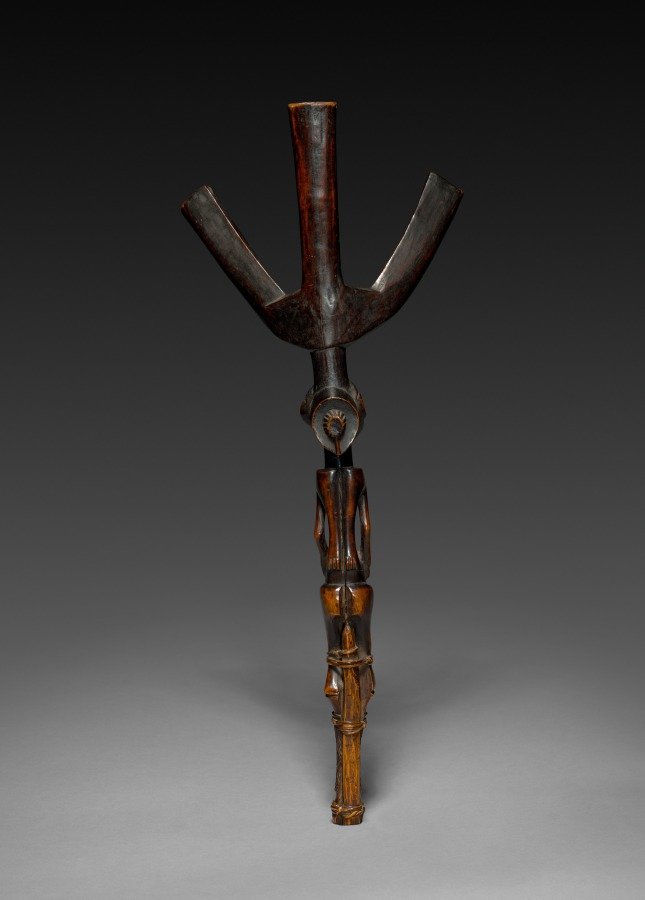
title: Bow Stand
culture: Africa, Central Africa, Democratic Republic of Congo, Luba-style carver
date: 1800s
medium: Wood and plant fiber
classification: Sculpture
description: A powerful symbol of the Luba king, bow stands were ceremonial objects that resided within the king’s private vicinity in the palace and were never displayed in public. Typically, bow stands depict a female figure, but the sculptor has carved a figure with ambiguously gendered human traits. This is a symbolic depiction that may allude to how divine rulers (mulopwe) were believed to have both “male” and “female” character traits, which allowed this sculpture to act as a vessel for spirits of any gender.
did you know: The shape of this wooden bow stand is based on a more practical version in metal used by hunters.